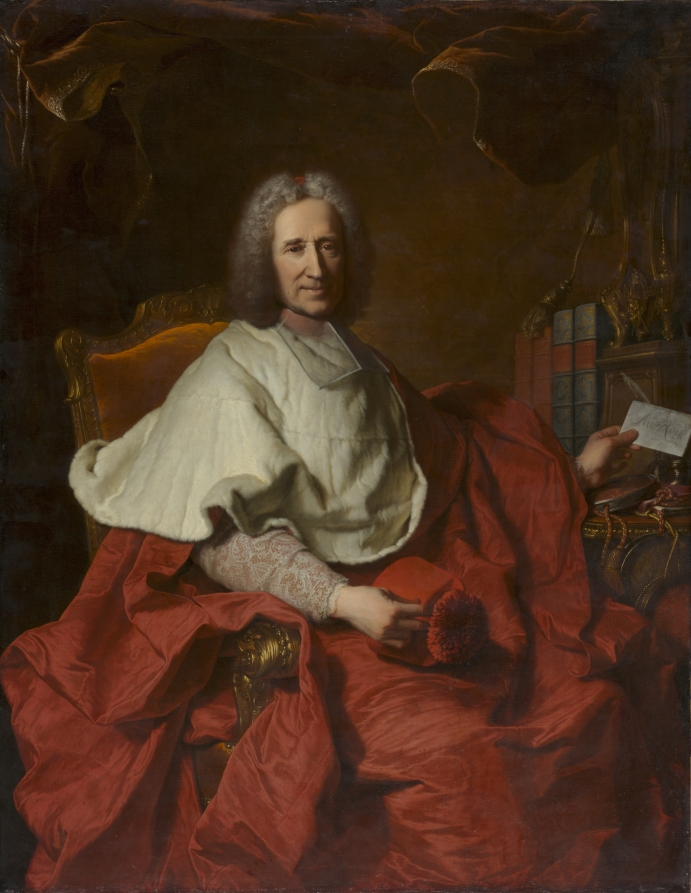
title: Portrait of Cardinal Guillaume Dubois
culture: France, 18th century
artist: Hyacinthe Rigaud (French, 1659–1743)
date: 1723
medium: oil on canvas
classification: Painting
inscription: signed on base of clock: fait par Hyacinthus Rigaud, 1723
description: With his luxurious, flamboyant dress—a voluminous wrap of scarlet silk topped by a short fur cape—the subject of Hyacinthe Rigaud’s portrait was clearly a man of consequence. Guillaume Dubois gained the favor of Louis XIV as tutor to his nephew, Philippe Charles, Duke of Orléans, and served as chief minister under Louis’s successors, the regent Duke of Orléans and Louis’s great-grandson, Louis XV. Dubois was appointed a Cardinal in the Catholic Church in 1721, a lofty aspiration at least partly motivated by political ambition: the title gave him the ability to remove political adversaries with impunity. Dubois holds a letter with the words Au Roy (to the king); this portrait was painted in the same year the young Louis XV ascended to the throne.